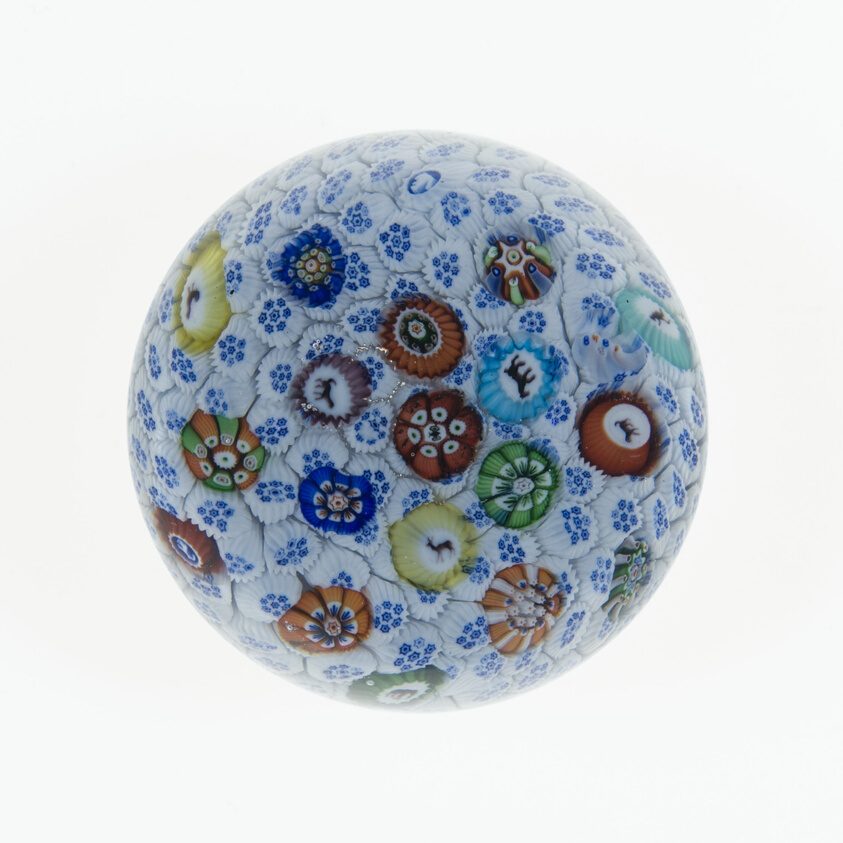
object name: Glass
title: Paperweight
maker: Baccarat Glassworks (Cristalleries de Baccarat); Lorraine, France, founded 1764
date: 1848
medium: Glass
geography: Baccarat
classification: paperweight; glass